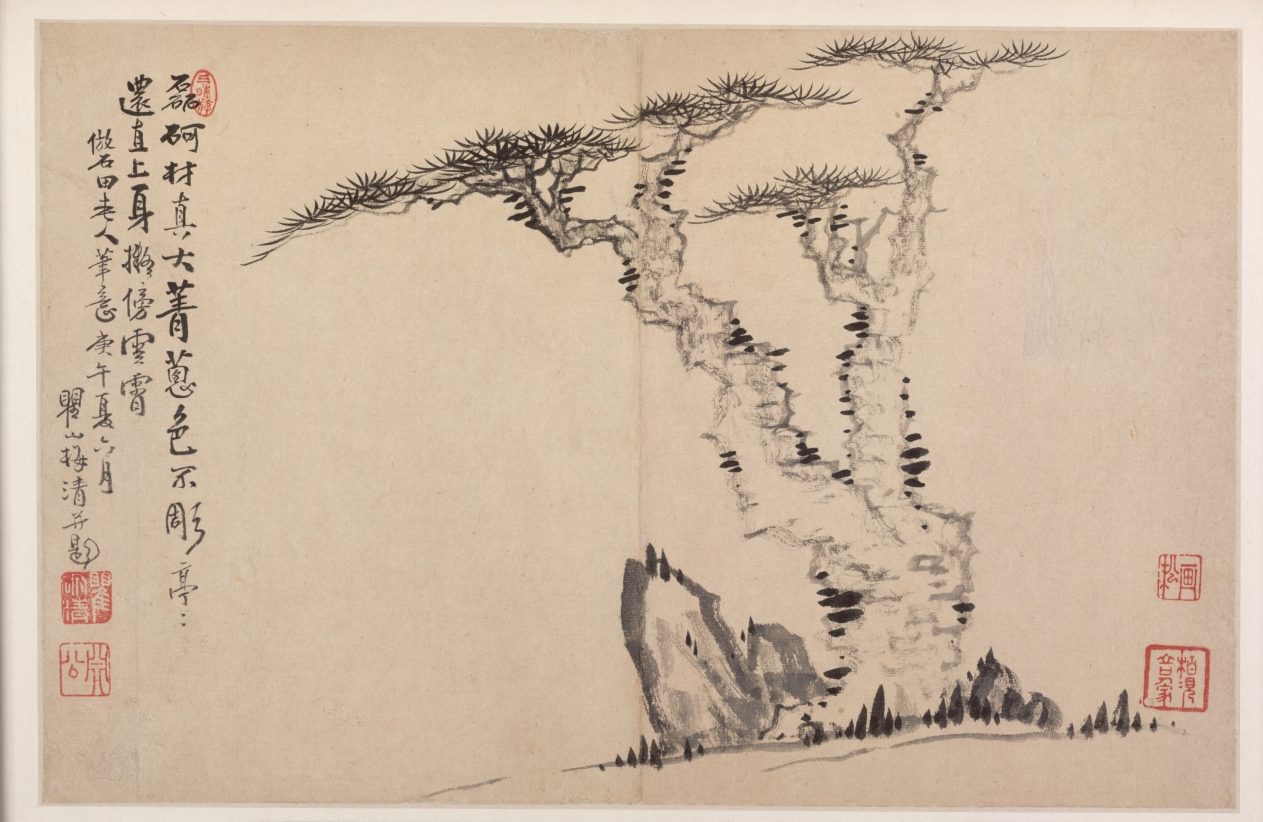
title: Landscapes in Various Styles after Old Masters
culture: China, Qing dynasty (1644-1911)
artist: Mei Qing (Chinese, 1623–1697)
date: 1690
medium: album leaf: ink and color on paper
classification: Painting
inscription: Summer Leaf III (formerly Leaf D). Artist's inscription, signature, and seals: [seal] Sanmei you. Massive in size, its trunk is truly grand,/ Luxuriant in foliage, its color never fades./ Standing along and still growing upwards,/ The trunk intends to be beside the clouds. Mei Qing of Qushan [painted] and inscribed in imitation of old Shih-t'ien's [Shen Zhou] brush idea in the gengwu year [1690], summer, the sixth month. [2 seals] Quxing, Qing; Yuangong. [2 seals, lower right corner] Huasong; Bo jian shan kou ren jia.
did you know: The inscription dates this album to summer 1690, shortly after Mei Qing's second trip to Huangshan 黃山 (Mt. Huang or Yellow Mountain).